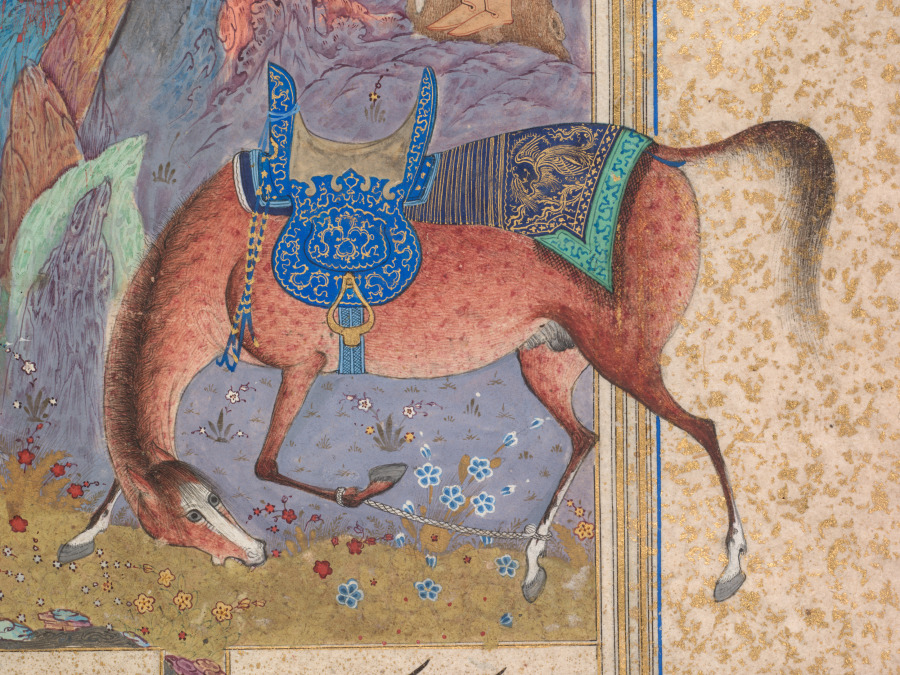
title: Rustam's seventh course: He kills the White Div, folio 124 from a Shah-nama (Book of Kings) of Firdausi (Persian, about 934–1020)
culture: Iran, Tabriz, Safavid period (1501-1722)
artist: attributed to Abd al-Vahhab (Persian, active about 1516)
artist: attributed to Mir Musavvir (Iranian, c. 1510–1555)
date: 1522–37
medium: Gum tempera, ink, gold, and silver on paper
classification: Manuscript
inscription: Script: Nasta'liq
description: The legendary hero Rustam brutally takes the demon chief’s liver blood, needed to cure his king of blindness. Paintings from the Shah-nama made for the Persian ruler Shah Tahmasp (reigned 1524–76) were acclaimed in their day for their brilliant coloring and refinement. Seven of the artists who contributed to this book moved to India to lead the new Mughal painting workshop in the 1550s. They introduced to the Indian artists a more complex color sensibility and preference for presenting faces in three-quarter view, as opposed to in profile.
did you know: Devils in the details: three peer into the White Div’s lair by the Caspian Sea.